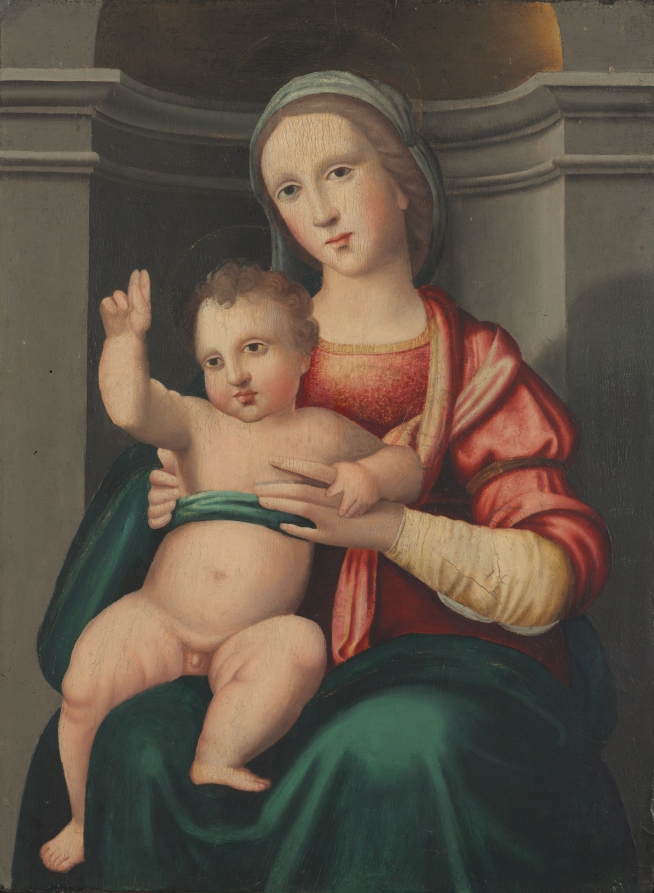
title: Madonna and Child in a Niche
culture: Italy, 16th century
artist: attributed to Antonio del Ceraiolo (Italian)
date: c. 1520s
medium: oil on wood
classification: Painting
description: This image of Madonna with the Christ Child on her lap has been extensively altered by restoration. During the Renaissance, it was important that the Christ Child's genitalia be exposed, for it declared that Christ is the humanization of God, that he experienced temptation, and that in his exposure, he was without shame. When it was repainted, a cloth was added to the image to cover the Christ Child's genitalia. In 1941 the removal of old overpaint returned the painting more closely to its original state.